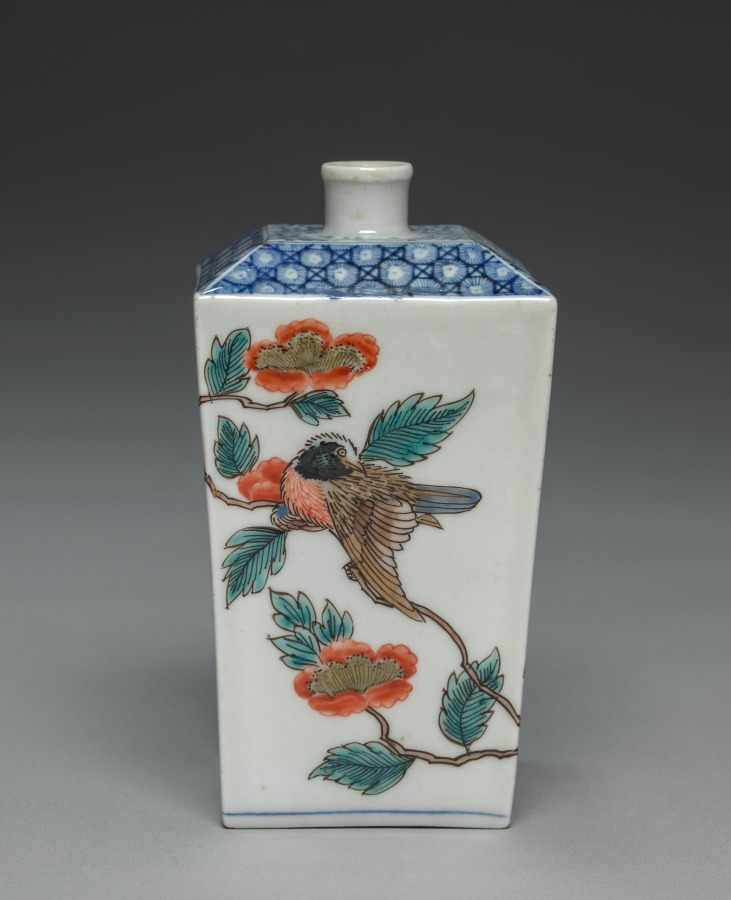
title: Bottle with Bird and Butterfly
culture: Japan, Edo period (1615–1868)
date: late 1600s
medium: porcelain with underglaze blue and overglaze color enamel and gold (Hizen ware, Ko-Imari type)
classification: Ceramic